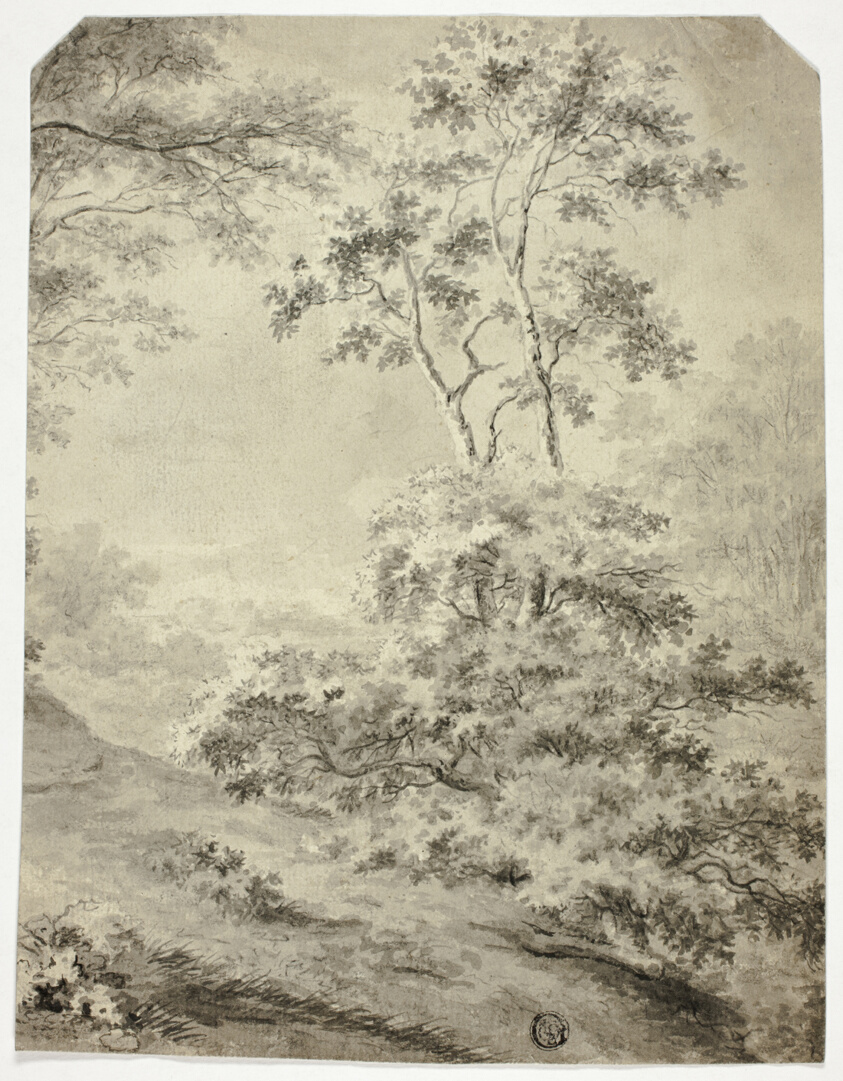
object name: Drawing and Watercolor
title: Forest Clearing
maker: Style of Jan Both (Dutch, c. 1618-1652)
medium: Black chalk, with brush and gray wash, on ivory laid paper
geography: Holland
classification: ink or chalk wash; drawings (visual works); prints and drawing